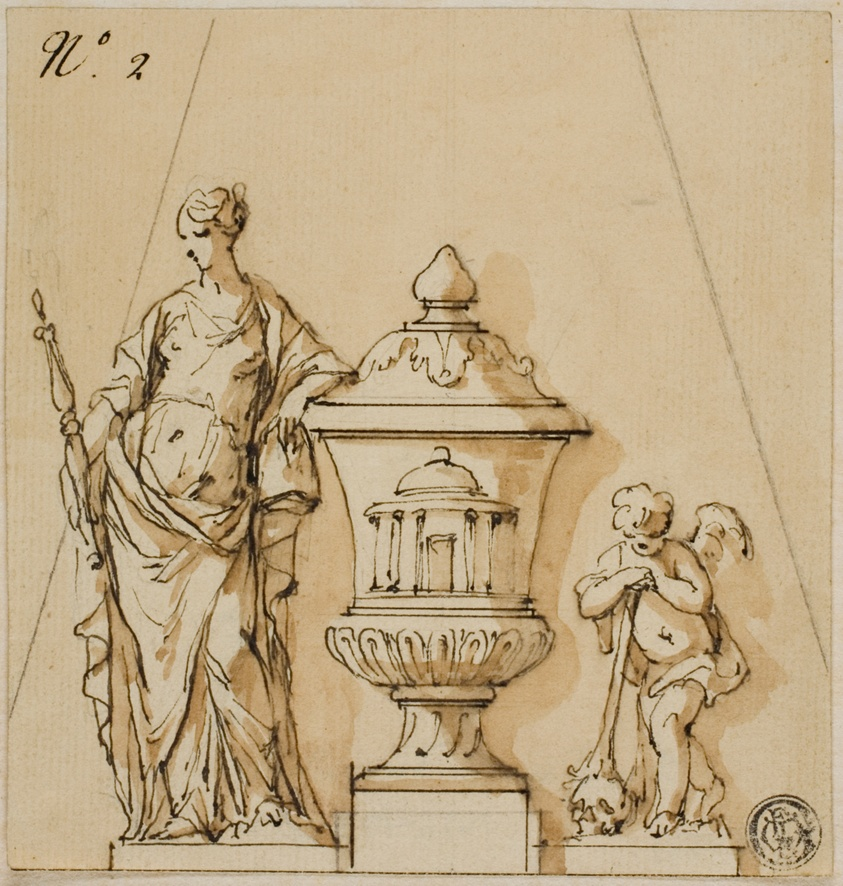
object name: Drawing and Watercolor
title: Design for a Funerary Monument with Fate, Urn, Putto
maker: John Michael Rysbrack (Flemish, 1693-1770)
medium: Pen and brown ink, with brush and brown wash, over graphite, on cream laid paper, tipped onto ivory laid paper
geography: Flanders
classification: pen and ink drawings; drawings (visual works); prints and drawing